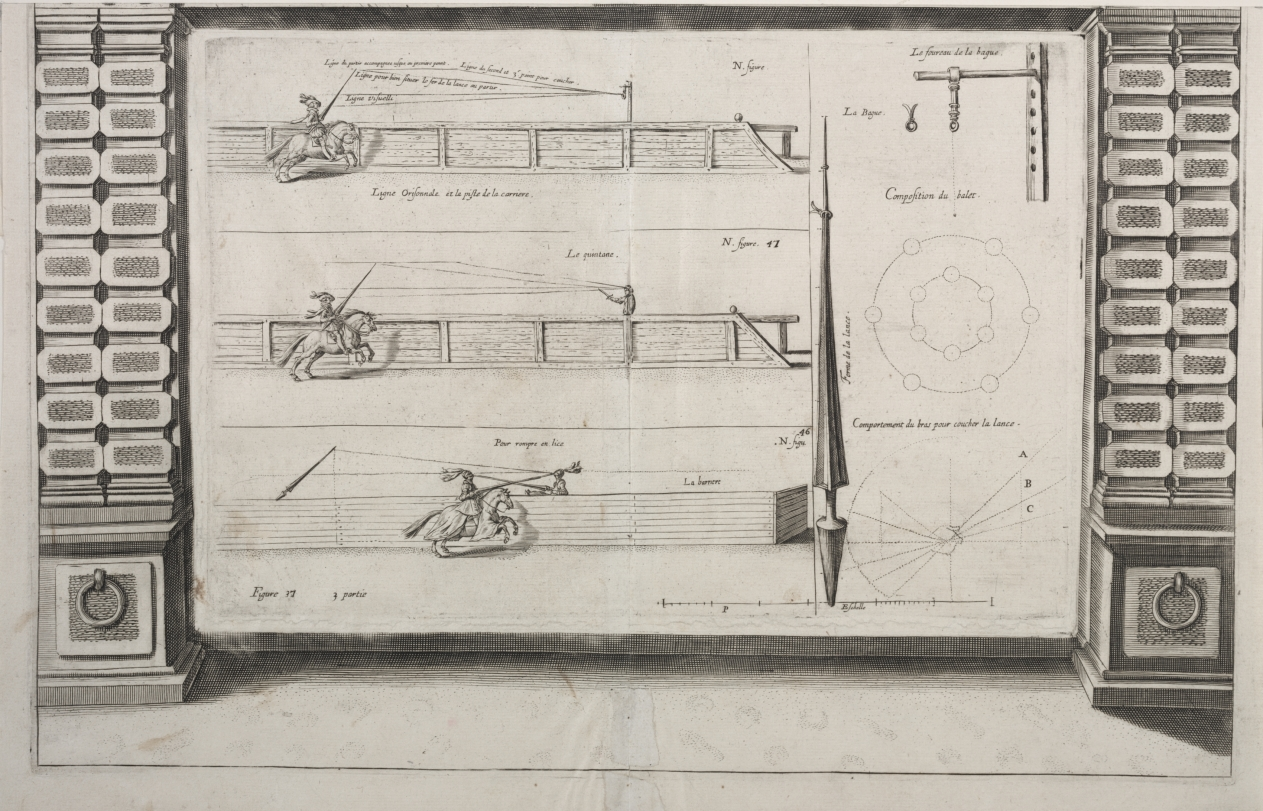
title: Diagram for Lance Practice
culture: France, 18th century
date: 1700s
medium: etching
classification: Print